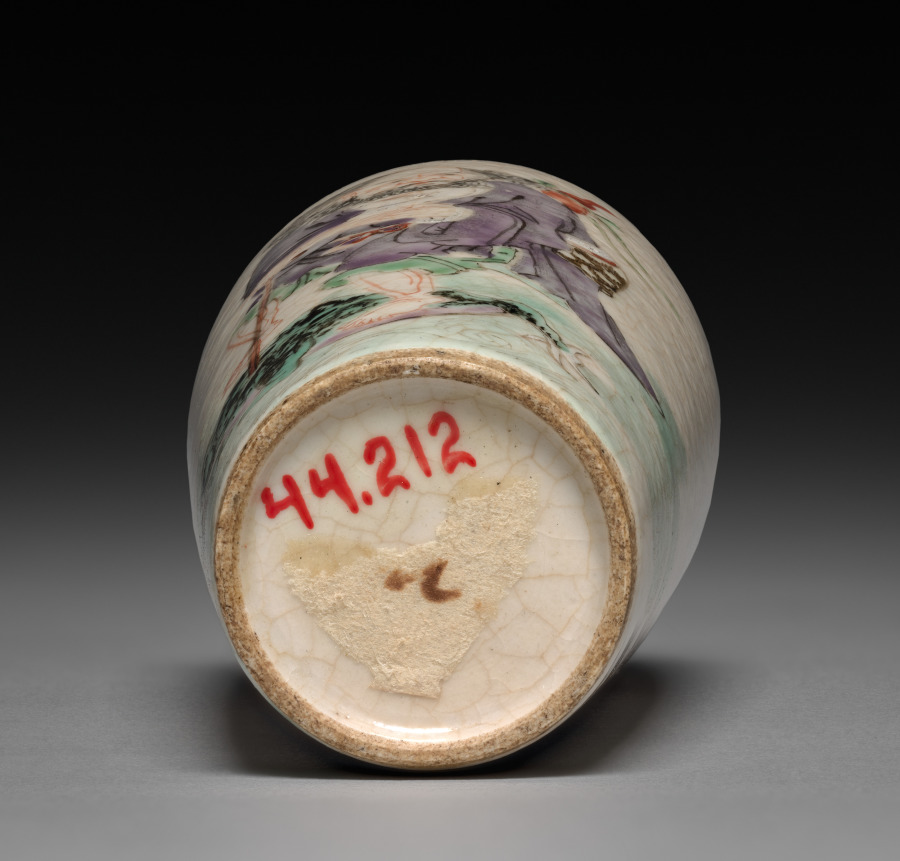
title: Snuff Bottle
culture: China, Qing dynasty (1644–1911), Qianlong reign (1736–95)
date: 1736–95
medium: porcelain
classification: Ceramic